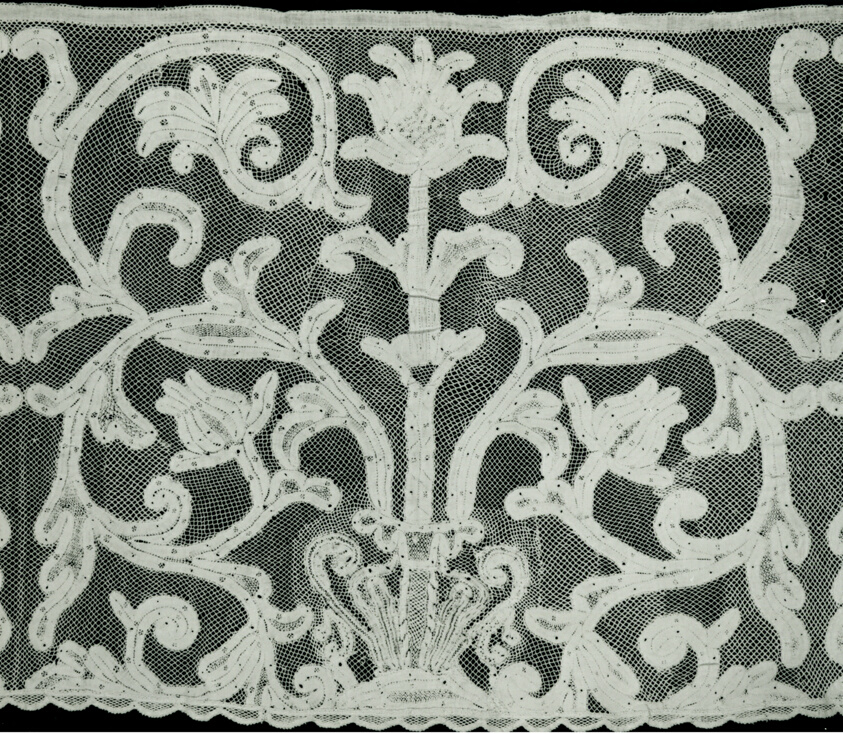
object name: Textile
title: Flounce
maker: Italy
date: 1725/75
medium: Linen, bobbin part lace in large sections; continuous clothwork tapes; edged with cotton, bobbin straight lace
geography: Italy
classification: textile; lace - bobbin